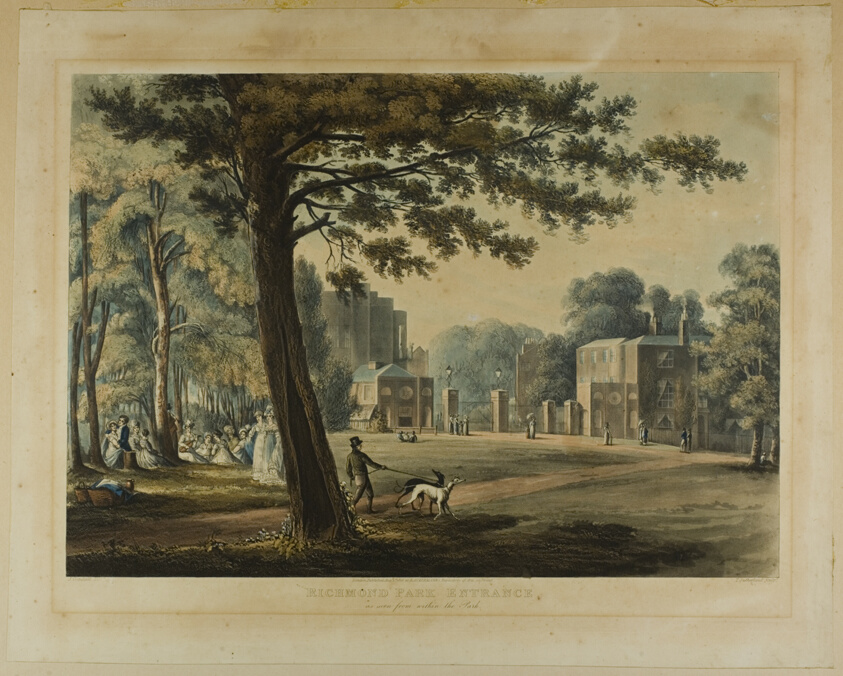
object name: Print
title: Richmond Park Entrance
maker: Thomas Sutherland (English, 1785-1825); after John Gendall (English, 1790-1865)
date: 1819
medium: Aquatint, heightened with watercolor, on paper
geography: England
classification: aquatint; print; prints and drawing